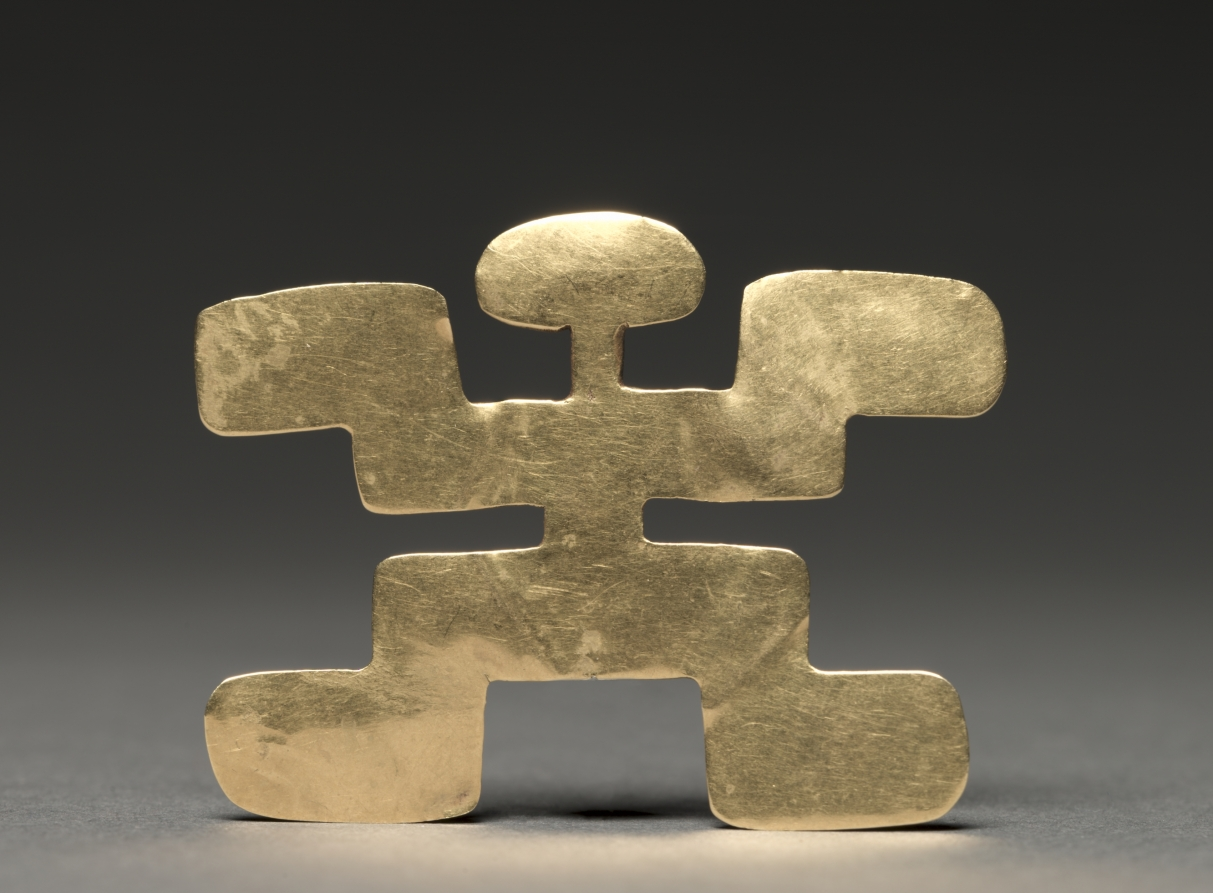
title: Abstract Figure Pendant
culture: Colombia, (Central Highlands), Tolima Style, c. 100-900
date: c. 100–900 CE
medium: hammered gold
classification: Metalwork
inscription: Numbered in red on back: "40".